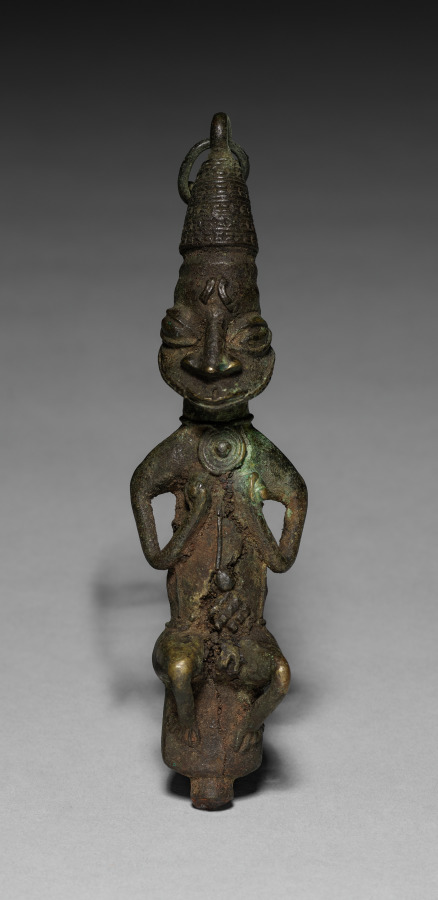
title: Pair of Ritual Staffs (ẹdan Ògbóni)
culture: Africa, West Africa, Nigeria, Yorùbá-style maker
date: possibly 1800s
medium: Copper alloy and iron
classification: Sculpture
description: The chain connecting these two figures allows them to be worn in public by a member of the Ògbóni or Òṣùgbó association as authority emblems. The male on the right gives the association’s typical salute by clasping his left fist on the right one, while the female on the left holds her breasts as a sign of welcome and generosity. The use of copper alloy and iron expresses Ògbóni/Òṣùgbó's concerns with longevity and durability.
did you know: Imagine how this would look when its owner wore it; the chain would go around the back of the neck and the figures would rest on their chest.